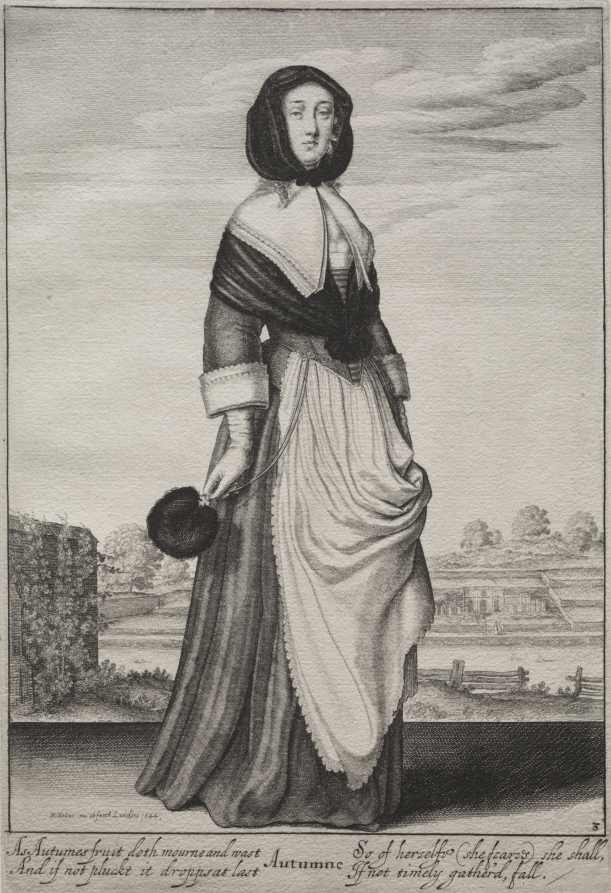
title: The Seasons: Autumn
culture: Bohemia, 17th century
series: The Seasons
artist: Wenceslaus Hollar (Bohemian, 1607–1677)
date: 1643–1644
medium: etching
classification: Print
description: Increments of time, such as the seasons, were one of the most popular subjects for printed sets. Wenceslaus Hollar alone made six different versions. Hollar was a professional printmaker with over 3,000 prints to his credit. Born in Bohemia, he worked in Germany, London, and Antwerp. He came to London in 1636 while in the employ of the Earl of Arundel, an important collector that Hollar met in Germany. Apparently free to pursue independent projects, Hollar designed and etched this series around 1643–44. Here, each season is personified by elegantly clad ladies, appropriately dressed for their particular climate, with recognizable landmarks in and around London in the backgrounds. The inscriptions, in an older version of English, are slightly suggestive, in keeping with the lighthearted character of the imagery. The setting is Albury in Surrey, a much loved retreat of the Earl of Arundel. The inscription reads: "As Autumn fruit does mourn and waste / And if not plucked it drops at last / So of herself (she fears) she shall / If not timely gathered fall."